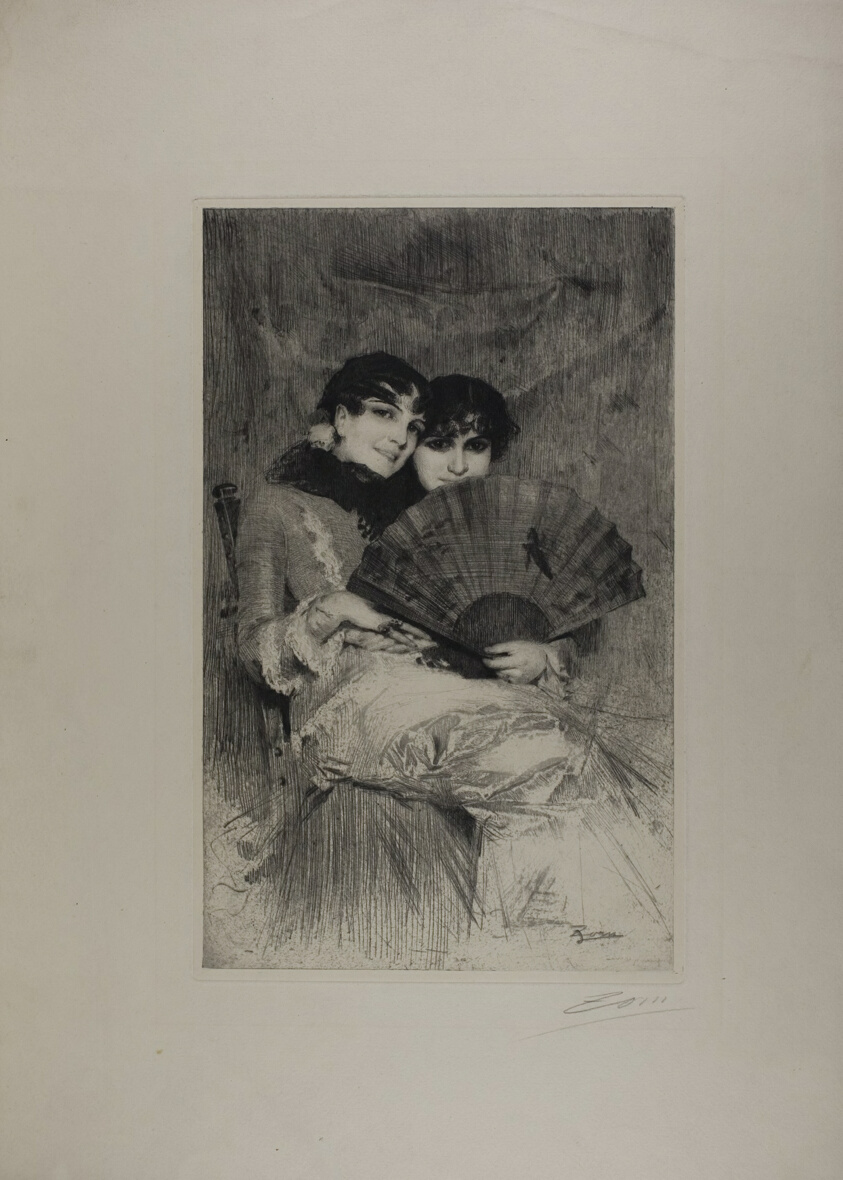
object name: Print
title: The Cousins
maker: Anders Zorn (Swedish, 1860-1920)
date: 1883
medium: Etching on ivory wove paper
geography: Sweden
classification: etching; print; prints and drawing